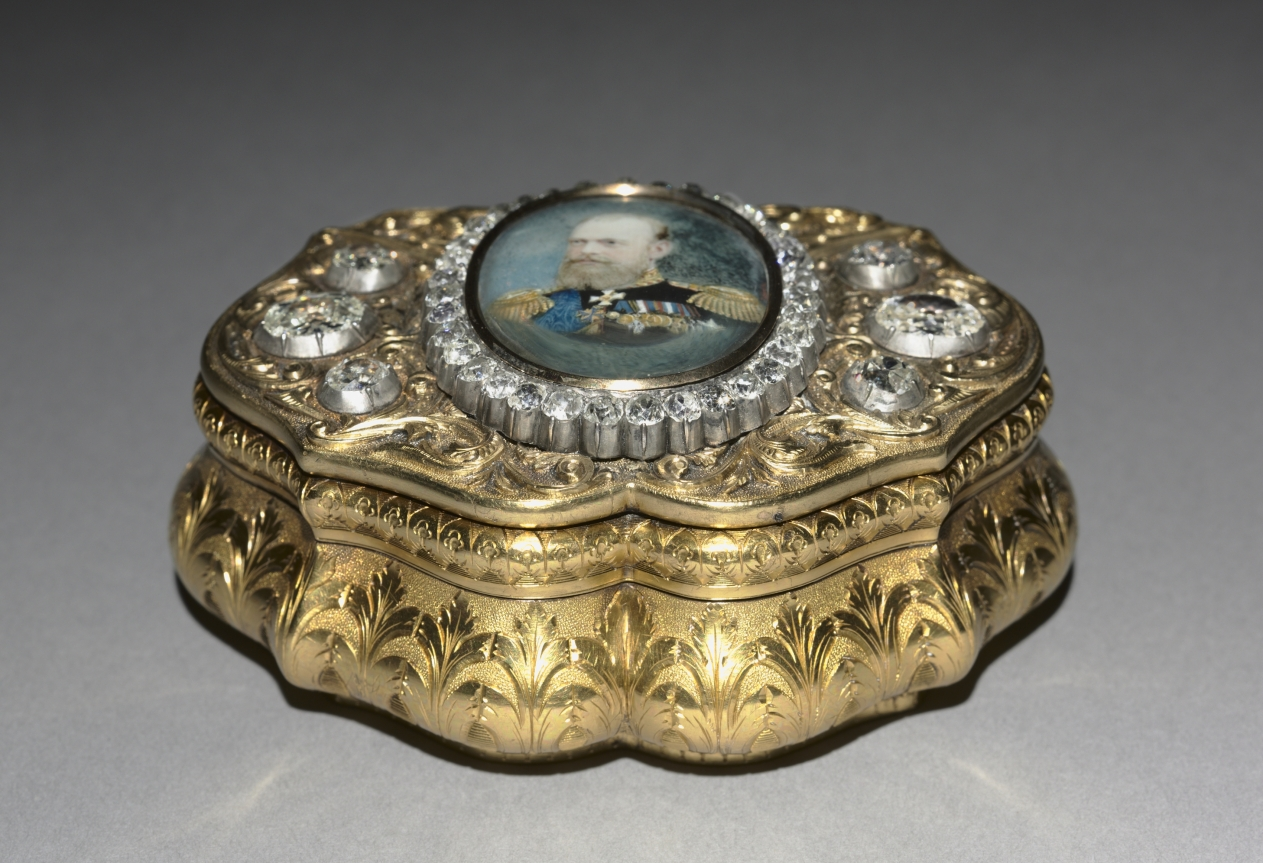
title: Box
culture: Switzerland, Neufchatel, 19th century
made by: Goffert (Russian)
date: c. 1850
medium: gold set with diamonds around a miniature of Tsar Alexander III (1845-1894)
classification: Miscellaneous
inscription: miniature signed in Russian: " " (Goffert).